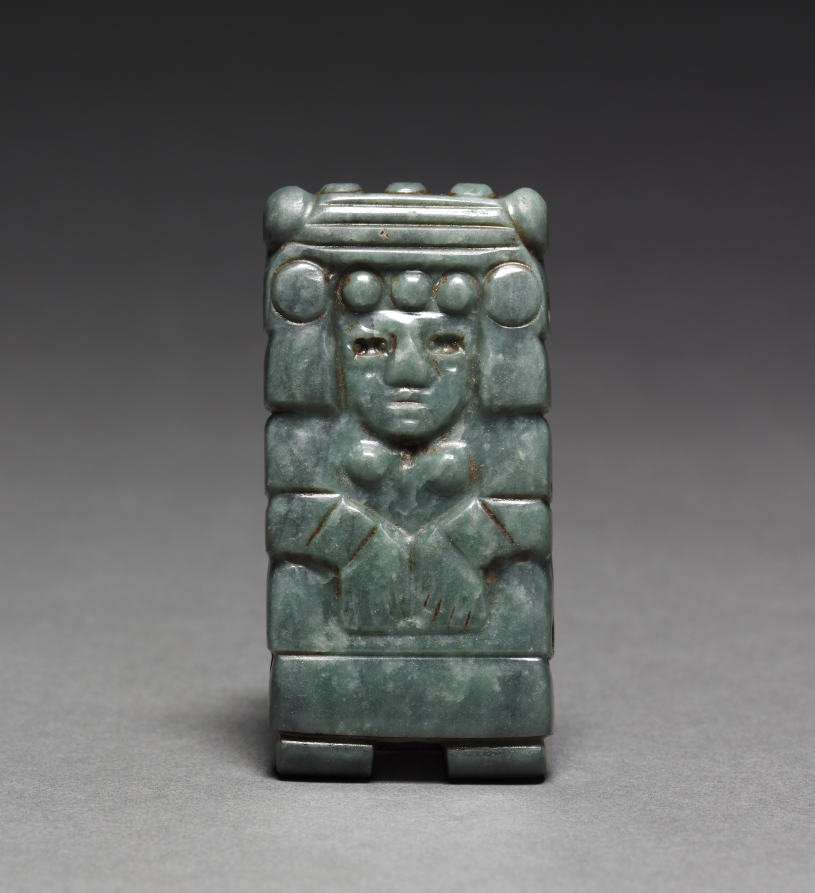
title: Goddess Plaque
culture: Central Mexico, Aztec, 13th-16th century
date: c. 1200–1519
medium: jadeite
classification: Jade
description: This pendant portrays Chalchiutlicue (Jade Skirt), a young goddess of water. Identifying insignia are her headband and the large tassels to either side of her face. She wears a huipil (long blouse) and skirt, and is posed kneeling, with her hands placed modestly in her lap. The green jade of which the pendant is carved symbolizes Chalchiutlicue's preciousness.